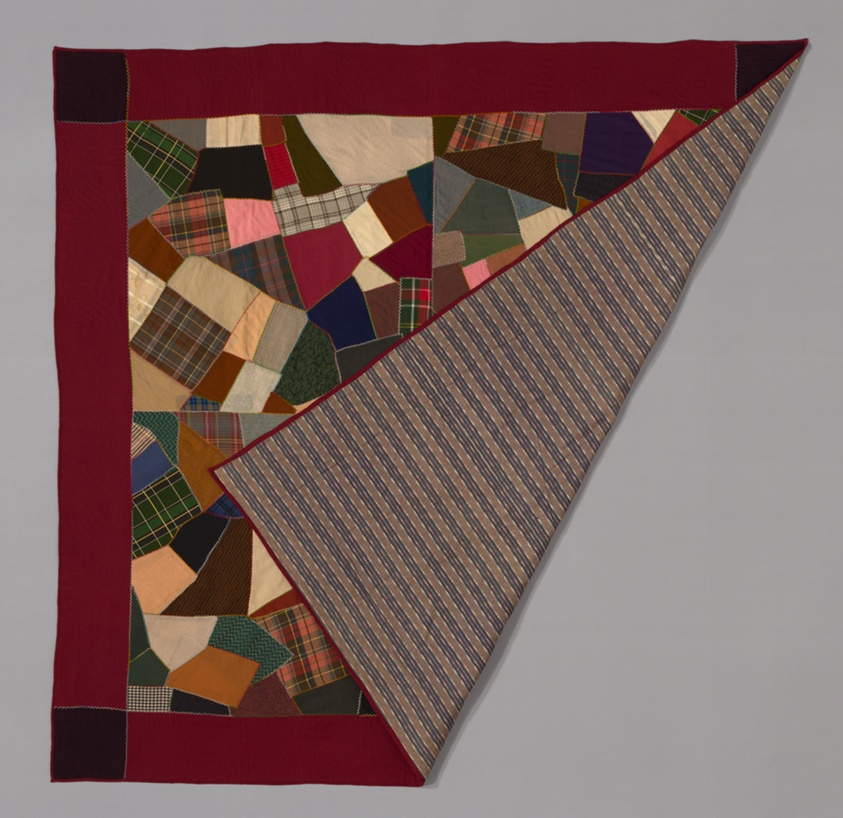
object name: Textile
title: Bedcover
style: amish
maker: Mennonite; United States, Pennsylvania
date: c. 1890/1900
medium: Wool, cotton, and silk; plain, twill, and satin weaves; some self-patterned, some with supplementary patterning wefts; some printed; pieced; embroidered with silk feather stitches; edged with twill weaves; backed with cotton, plain weave; printed; quilted with cotton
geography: Pennsylvania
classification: needlework - quilt; textile